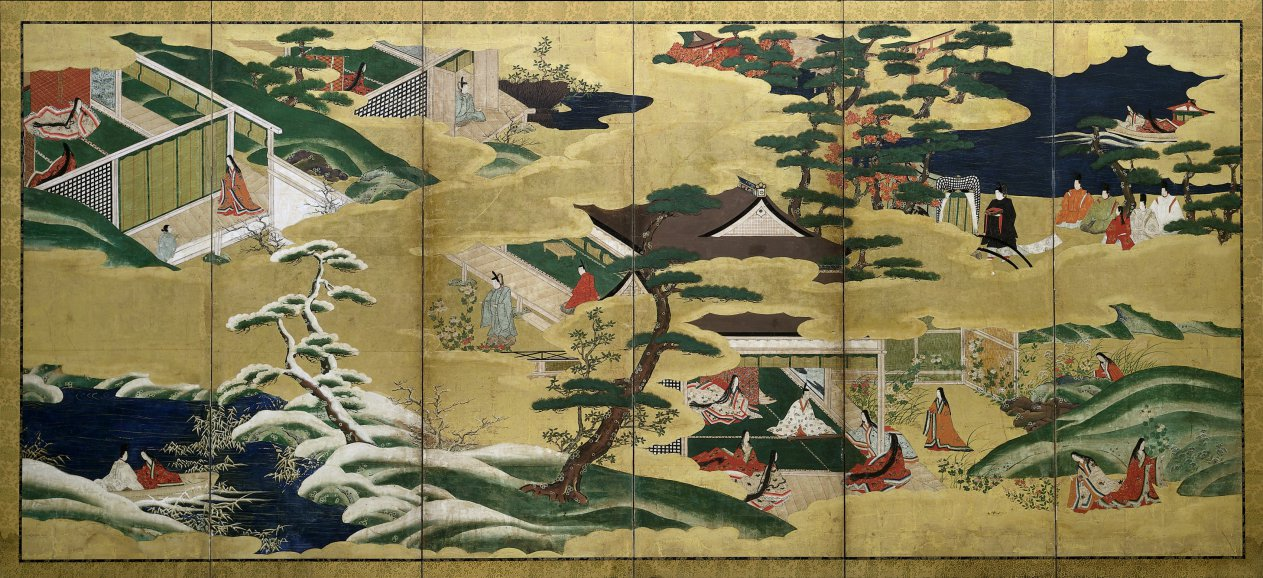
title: Scenes from the Tale of Genji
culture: Japan, Edo period (1615–1868)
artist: Tosa School (Japanese)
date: late 1700s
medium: One of a pair of six-panel folding screens; ink, color, and gold on gilded paper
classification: Painting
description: Folding screens served as temporary dividers in traditional Japanese open-plan architectural spaces. This pair was inspired by Japan’s most celebrated work of literature, the Tale of Genji, written by Murasaki Shikibu, an attendant to the empress in the early 11th-century imperial court. The novel follows the love life of the “Shining Prince” Genji and delves into the psychological states of his many companions. Distinct episodes are nestled within a matrix of golden clouds and landscape elements. Each screen includes six episodes presented in a nonlinear fashion, capturing scattered highlights of the story.